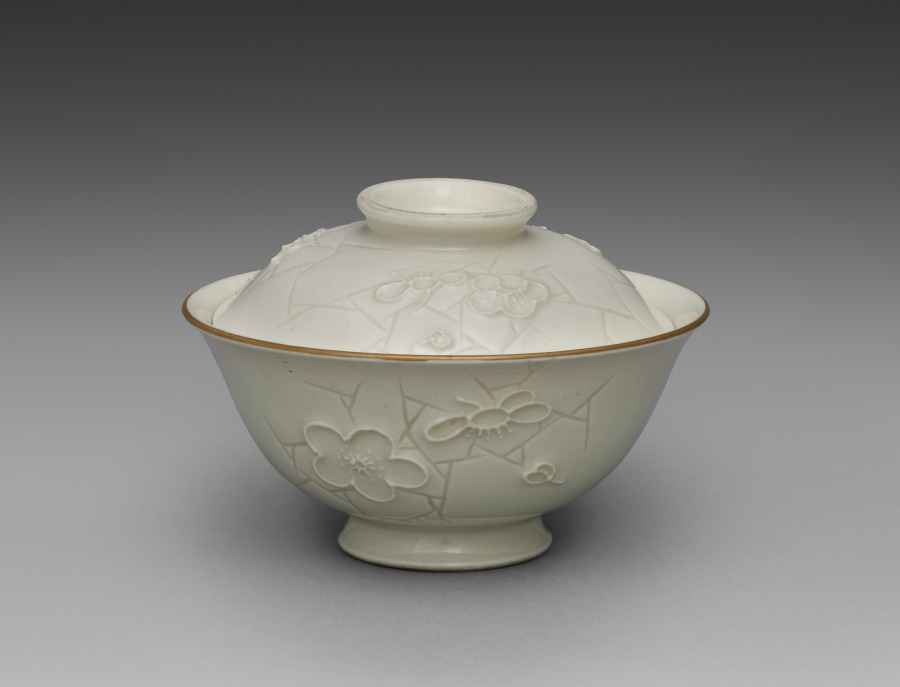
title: Covered Bowl from Dining Set with Plum Blossoms and Cracked-Ice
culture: Japan, Meiji period (1868–1912)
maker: Seifū Yohei II (Japanese, 1844–1878)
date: c. 1875–78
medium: Porcelain with molded designs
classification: Ceramic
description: Each item in this set has a delicate low-relief design of flowering plum branches over scattered, intersecting lines meant to resemble the cracked-ice surface of a frozen body of water and is signed on the base in gold pigment. While Yohei II produced many fine works in underglaze blue, like those produced by Kiyomizu Shichibei, he also made works in quite different styles later in his career, from the early 1870 s. In 1873, he was appointed purveyor to the Industrial Center of Kyoto Prefecture, a designation associated with Kyoto’s efforts to reach an international market through the port of Kobe; and from 1875 until his death, he was involved in national-level projects to present Japanese ceramics across the world. It was during this period that Yohei III was apprenticed to Yohei II, and it has been suggested that this set may in fact be an early example of Yohei III’s work, which he signed with his teacher’s name. Decorated with flowers resembling Japanese textile motifs, the set calls to mind the design of Yohei II’s pair of vases with plum blossoms in the Victoria and Albert Museum. Here, the elaborate trees created for a formal public exhibition setting have been translated into the approachable blossoms of the genteel domestic environment. While the designs are consistent across the pieces, each raised flower petal and pistil and each incised line in the ice was done by hand, so the cups, bowls, and dishes are similar yet unique. The bottoms of two boxes once identified the set’s owner, but the information has been deliberately obscured with black ink. However, inscriptions still visible appear to indicate two occasions, once at the end of July 1886 , and once again in June 1916 , when parts of the set were requested from Hokura in Niigata Prefecture. The location corresponds to a neighborhood in the present-day city of Jōetsu. The surname Tsuji 辻 also appears on a paper tag affixed to one of the box cloths. Future research may possibly reveal more about their provenance. A vase by Yohei III in a private collection combines the formal grandeur of the Yohei II vases in the Victoria and Albert Museum with the gentler design of this dining set, placing flowering plum trees against soft, scalloped-edge clouds resembling those in golden screens.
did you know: The dining wares have a creamy white coloration that the four boxes containing them identify as Korean in style.